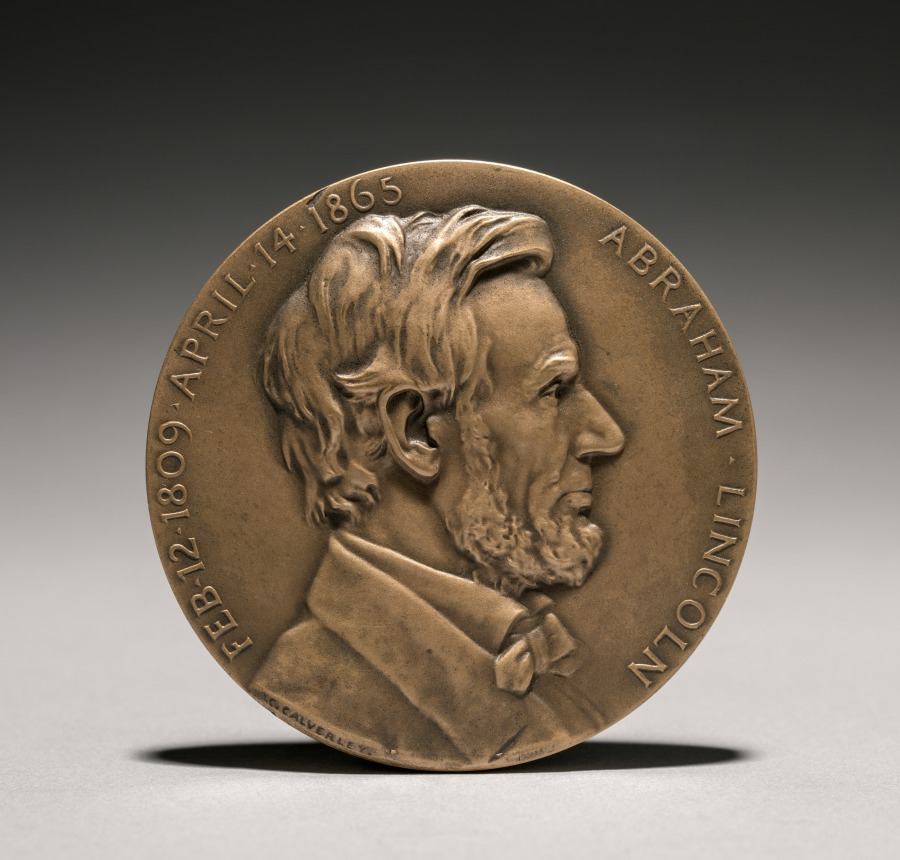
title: Abraham Lincoln Medal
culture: America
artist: Charles Calverley (American, 1833–1914)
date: 1900s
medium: bronze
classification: Metalwork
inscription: obverse - right-hand side: "FEB.12.1809 APRIL.14.1865"; left-hand side: "ABRAHAM LINCOLN." Below: "C. Calverley." reverse - "WITH MALICE TOWARD NONE/ WITH CHARITY FOR ALL/ WITH FIRMNESS IN THE RIGHT/ AS GOD GIVES US TO SEE THE RIGHT/ LET US STRIVE ON TO FINISH/ THE WORK WE ARE IN/ ALincoln [in ligature]."